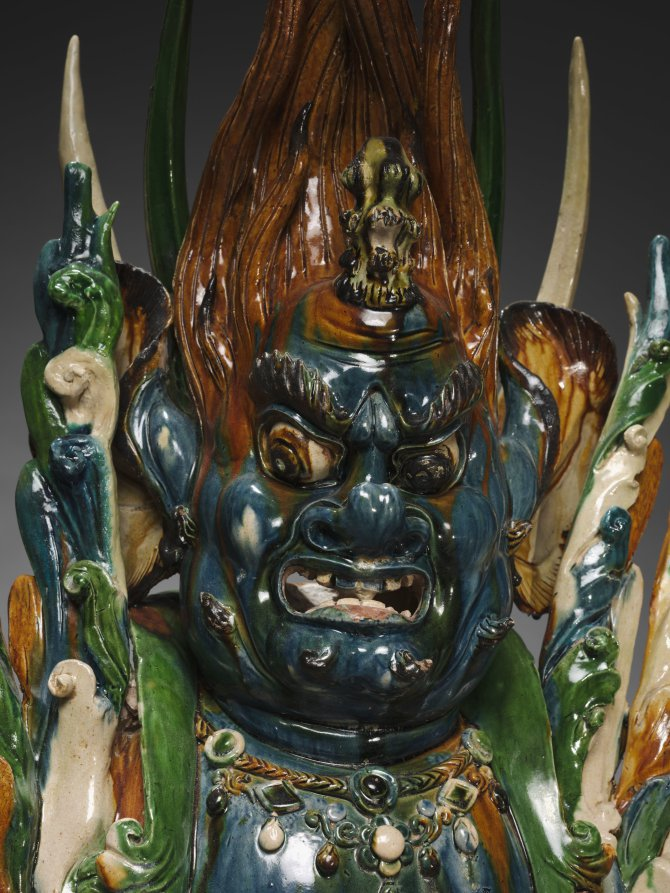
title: Tomb Guardian with Human Face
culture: China, probably Shaanxi province, Xi'an, Tang dynasty (618-907)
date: early 700s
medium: glazed earthenware, sancai (three-color) ware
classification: Ceramic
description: With their fierce expressions and exaggerated physical features, these two fantastic guardian creatures were intended to guard the entrance to a tomb, warding off evil as well as keeping the soul of the deceased from wandering. Known as "earth spirits" or qitou, this one sports a human face with huge protruding ears and a short horn surrounded by fiery, twisting hair; the other has an animal face and a pair of antlers growing above its eyebrows. Their many elongated spikes heighten the fearful intensity. Before tomb sculptures were placed in the tomb, they were carried through the streets in a funerary procession. Funerary gifts provided the deceased with means for the afterlife. They were also an expression of filial piety and demonstrated the wealth and power of the descendants.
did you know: Cobalt blue glaze used on the head and chest was imported from the Middle East.